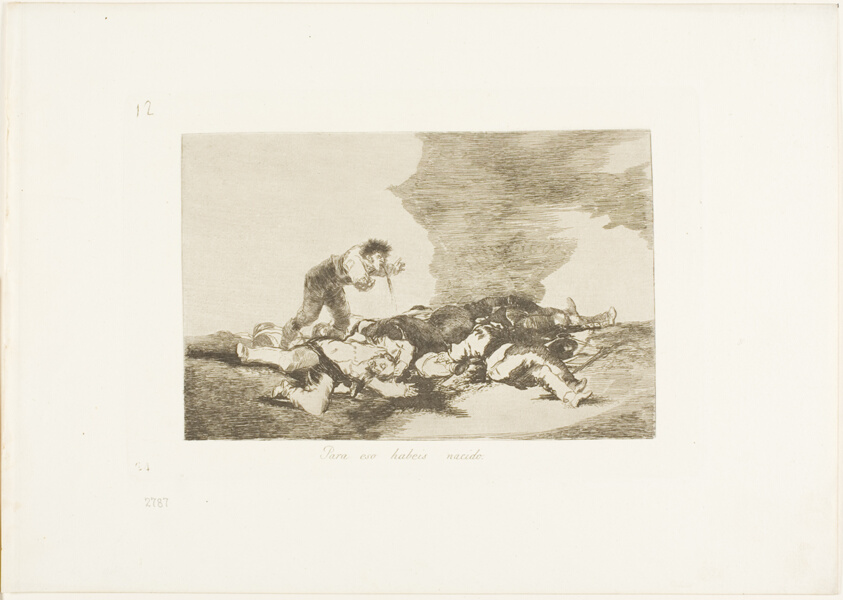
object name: Print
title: This is What You Were Born For, plate twelve from The Disasters of War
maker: Francisco José de Goya y Lucientes (Spanish, 1746-1828)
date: 1810/12, published 1863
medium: Etching, lavis, drypoint and burin on ivory wove paper with gilt edges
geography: Spain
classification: etching; print; prints and drawing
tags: war